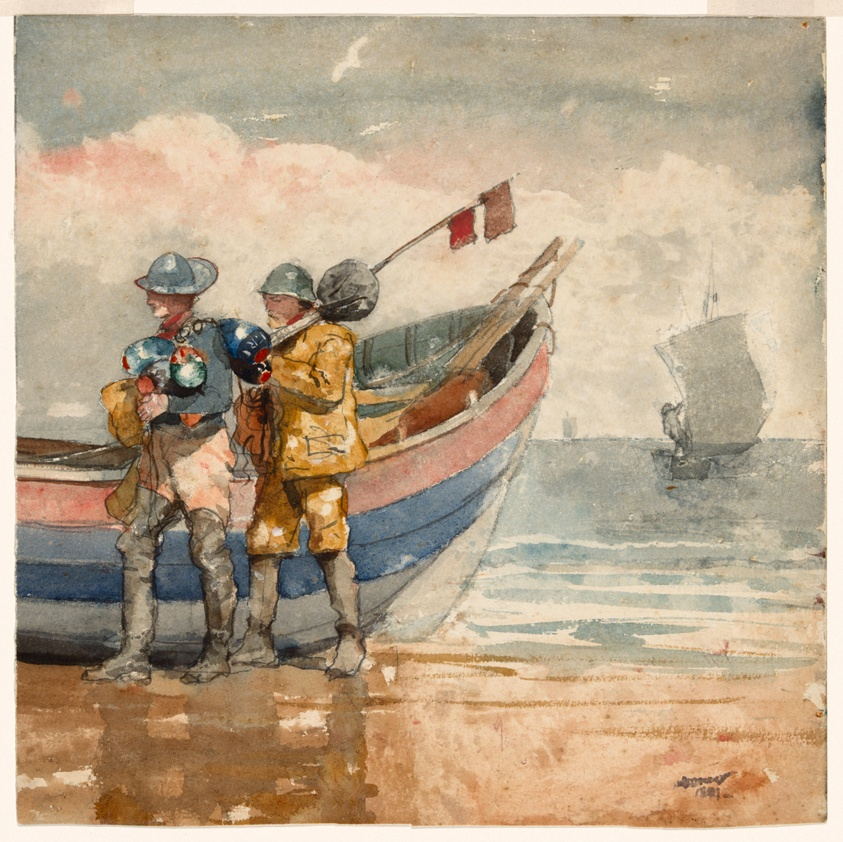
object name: Drawing and Watercolor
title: The Return, Tynemouth (recto) Study (verso)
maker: Winslow Homer (American, 1836-1910)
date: 1881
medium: Transparent watercolor, with touches of opaque watercolor, rewetting, blotting, and scraping, heightened with gum glaze, over graphite, on moderately thick, moderately-textured, ivory wove paper (left and lower edges trimmed)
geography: United States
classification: watercolor; drawings (visual works); prints and drawing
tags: boats, people, fishing